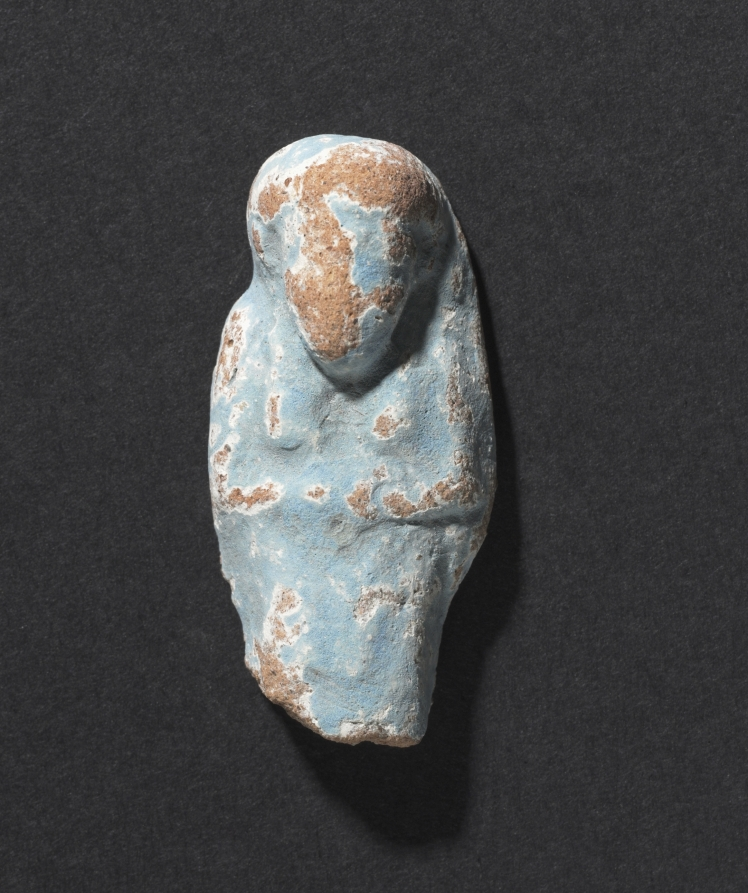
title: Shawabty of Ditamenpaankh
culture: Egypt, Late period (715–332 BCE), Dynasty 25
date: 715–656 BCE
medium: terracotta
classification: Funerary Equipment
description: High demand for shawabtys in the Late Period, a time when as many as 400 or more shawabtys were placed in the tomb with the deceased, gave rise to a specialized container for storing them: the shawabty box. This example is inscribed for the lady of the house, Ditamenpaankh, and was probably one of a pair originally made for her. The single-masted boat on the box's lid is perhaps an allusion to the pilgrimage of the deceased to the holy city of Abydos, the cult city of Osiris, king of the dead. The shawabtys inside are crude, mass-produced examples cast in an open mold. Made of terracotta, their blue paint imitates more costly shawabtys made of faience. As for the shawabty spell, it has been removed from its traditional location on the shawabty's front and relocated onto the sides of box, where it needed only to be written once, thus expediting production.